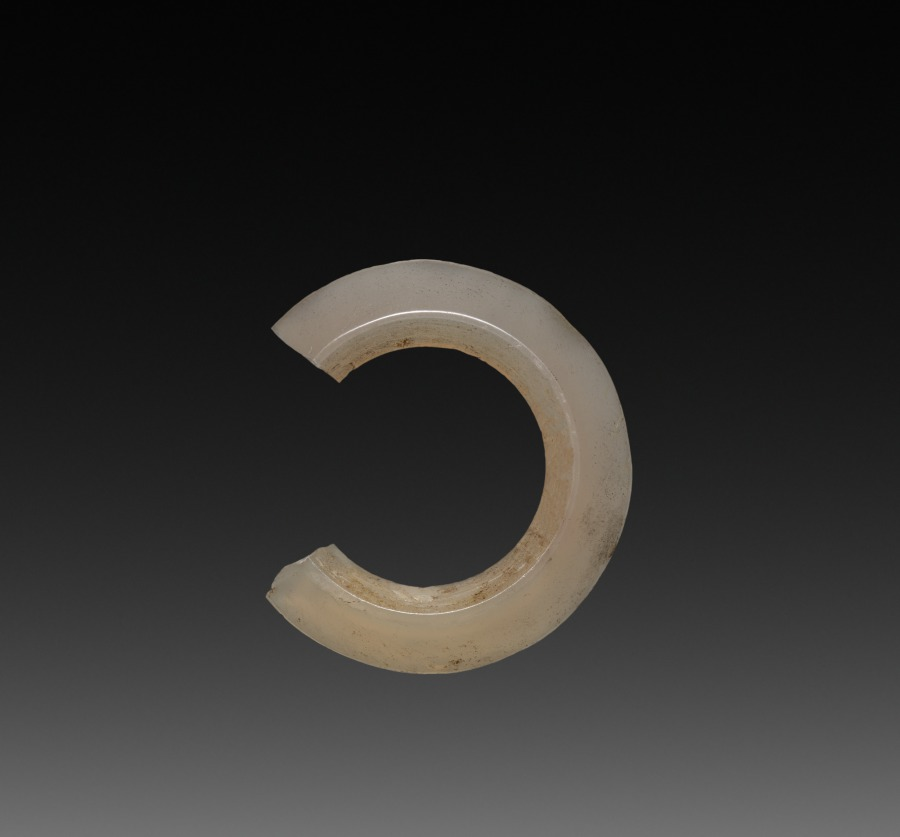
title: Ring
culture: China, Han dynasty (202 BCE–220 CE) or later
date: 200 CE or later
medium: agate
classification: Jewelry